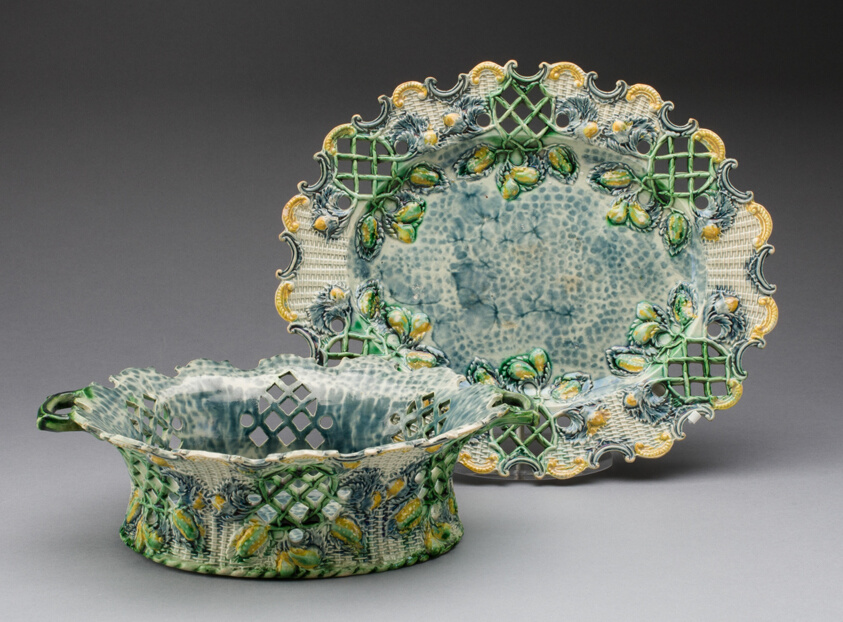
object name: Ceramics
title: Basket and Stand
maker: Staffordshire, England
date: 1760/70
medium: Lead-glazed earthenware (creamware)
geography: Staffordshire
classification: tableware; ceramics; creamware; earthenware; european decorative arts; lead-glazed earthenware